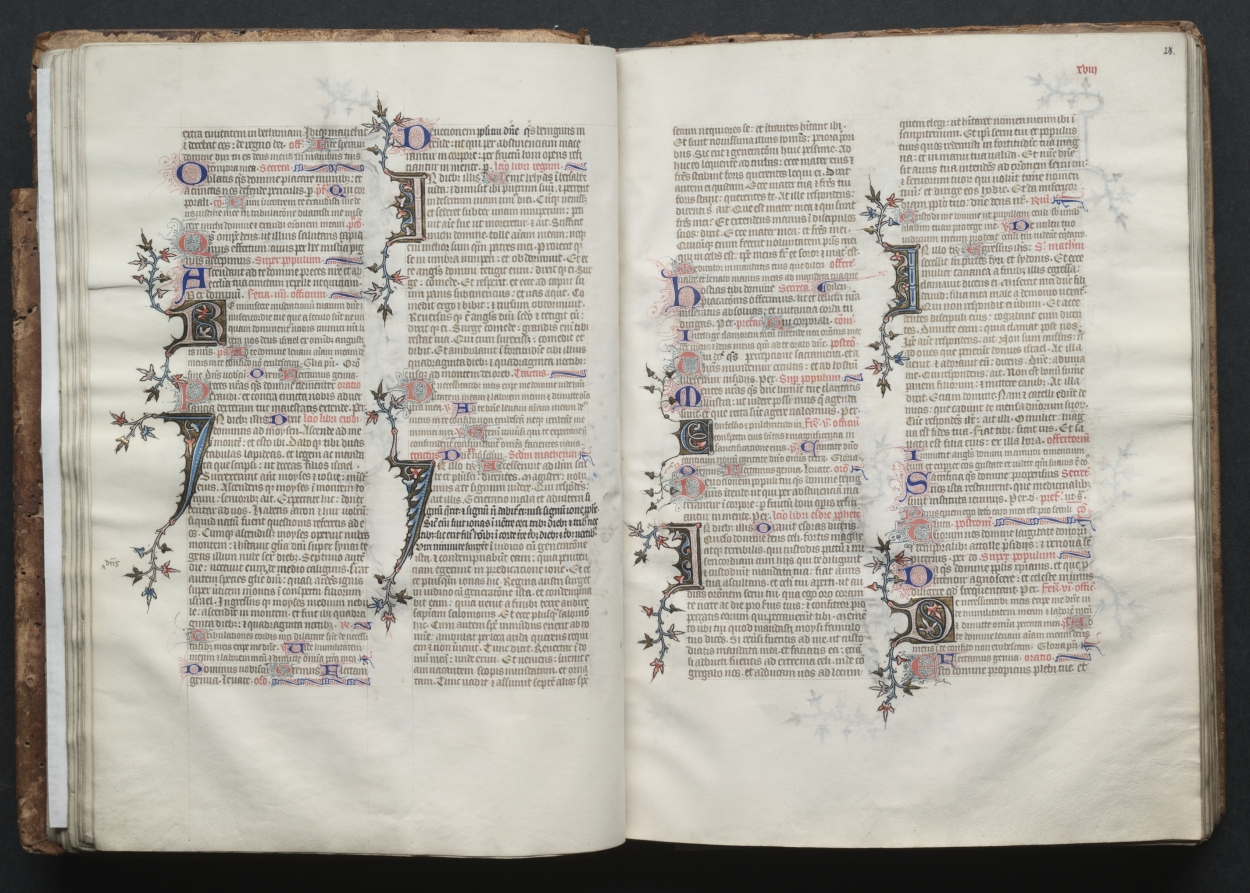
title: The Gotha Missal: Fol. 27v, Text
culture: France, Paris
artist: Master of the Boqueteaux (French)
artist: and Workshop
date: c. 1375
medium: ink, tempera, and gold on vellum; blind-tooled leather binding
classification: Bound Volume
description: The style and quality of this manuscript's decoration is typical of deluxe Parisian books made for aristocratic or royal patrons. Most of the book's decoration appears to be the work of the Master of the Boqueteaux, an artist active at the court of King Charles V (died 1380). His style was apparently shared by a number of book illuminators working in and around Paris. It is very possible that the Gotha Missal belonged to Charles V, but is not provable because the manuscript has no royal portraits and lacks a colophon. Given the book's magnificent decoration, however, it would seem that it was produced for a Valois prince, if not for the king himself. The manuscript receives its name from the German dukes of Gotha, its later owners.